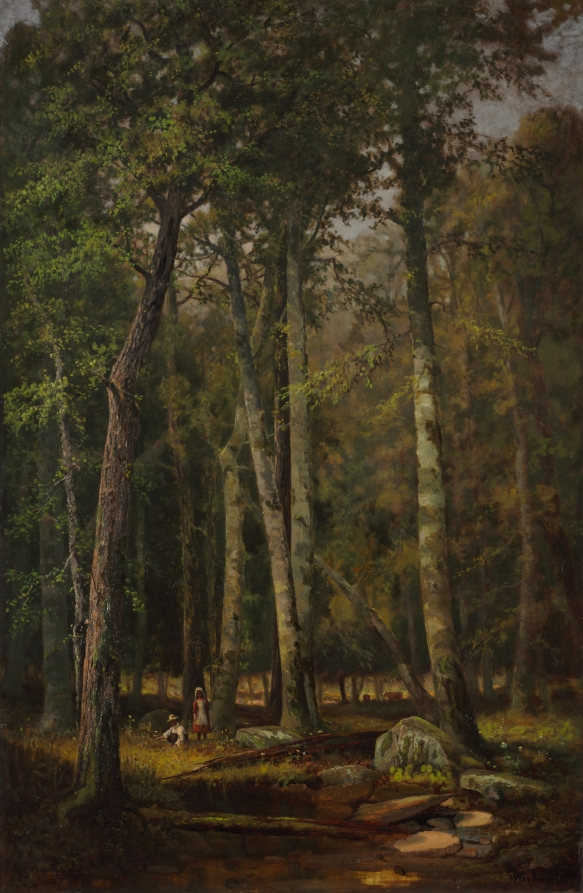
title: A Summer Afternoon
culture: America, Ohio, Cleveland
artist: R. Way Smith (American, 1840–1900)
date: 1882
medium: oil on canvas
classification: Painting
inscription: signed lower right: R. Way Smith 82; signed on back of canvas: A Summer Afternoon R. Way Smith 81.